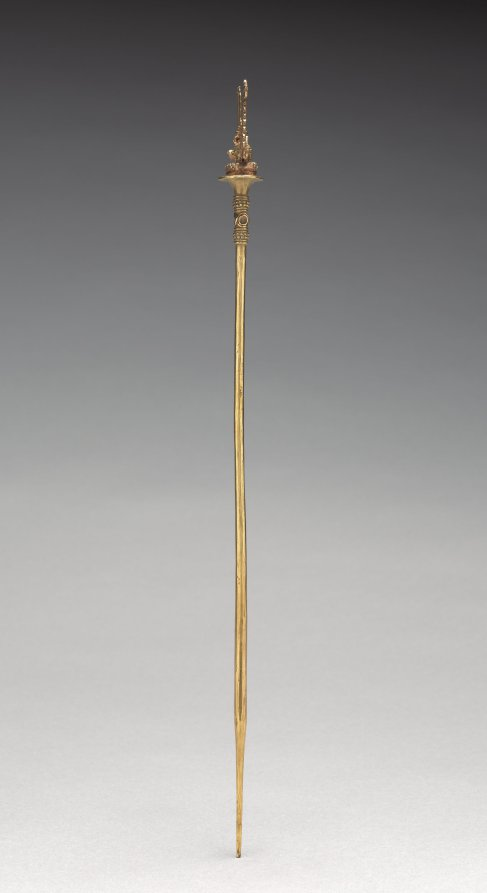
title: Lime Dipper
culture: Colombia, Calima region, Yotoco style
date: c. 1–800 CE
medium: gold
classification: Metalwork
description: Coca-leaf chewing was a widespread ritual in ancient South America. Utensils included a container and a dipper or spoon for powdered lime (made from seashells), added to the coca to enhance its gentle, stimulating effect. Colombian cultures are especially known for transforming these utensils into works of art made of precious metal. The image on the tallest dipper is wonderfully complex. A serpent coils at the bottom, beneath a snarling animal with a huge, vertical tail. This animal has a tiny monkey on its back; the monkey also has a huge tail, which rests on the first animal's head like a headdress. This intricate image was created with the lost-wax casting process.